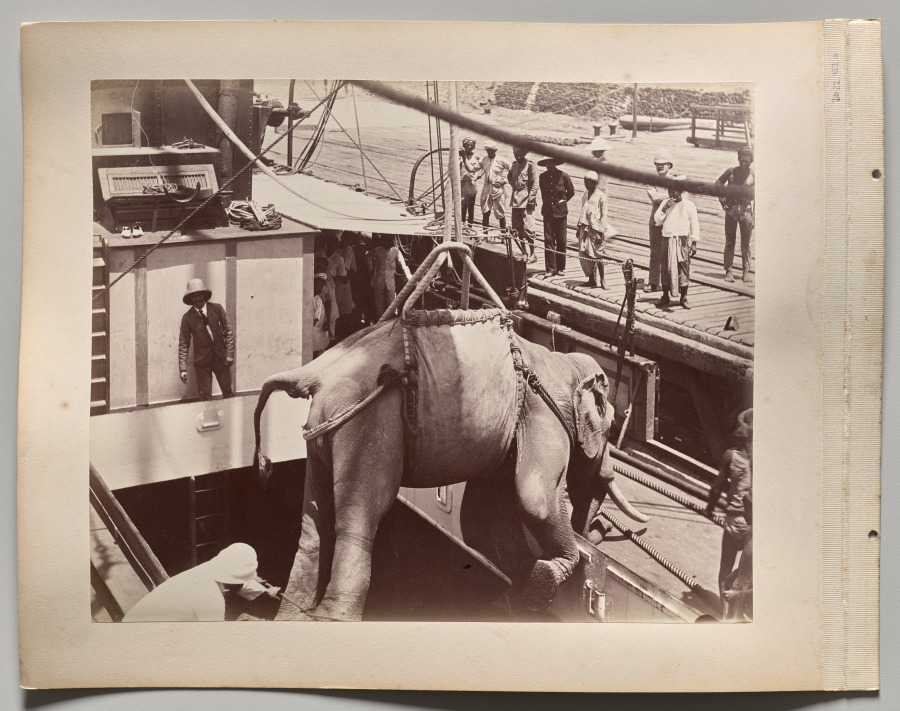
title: Untitled (elephant being loaded onto a ship, recto)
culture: England, 19th century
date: 1870s-1880s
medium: albumen print mounted on an album page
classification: Photograph